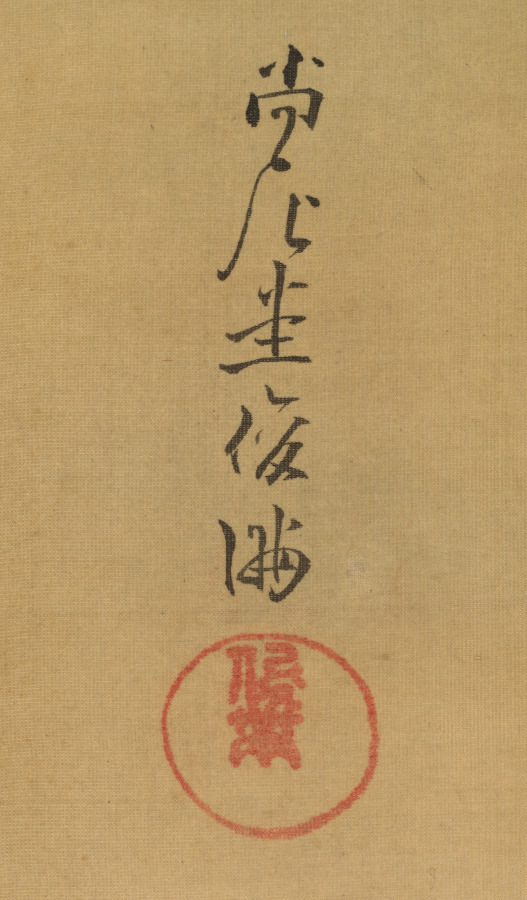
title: Beauty with Fireflies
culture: Japan, Edo period (1615–1868)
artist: copy after Kubo Shunman (Japanese, 1757–1820)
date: early 1800s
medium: Hanging scroll; ink and color on silk (ivory roller ends)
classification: Painting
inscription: Signed at lower left: 尚左堂俊満 Shōsadō Shunman Sealed at lower left: round red seal：俊満 Shunman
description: A young woman has passed beneath an aged willow tree as she strolls along a riverbank carrying a cage full of fireflies. The painting is a copy after Kubo Shunman, best known as a composer of witty verses in 31-syllables (kyōka) and designer of limited edition prints called surimono. Shunman was active during the mature era of ukiyo-e production, and his more formal paintings most often took as their subjects beautiful Chinese or Japanese women. Here, his imitator commemorates one of summer's most delightful evening pastimes, the observation of the flickering lights of the firefly. The woman is presented in a ubiquitous summer setting, a refreshingly cool and breezy riverbank in earshot of rustling willow leaves.